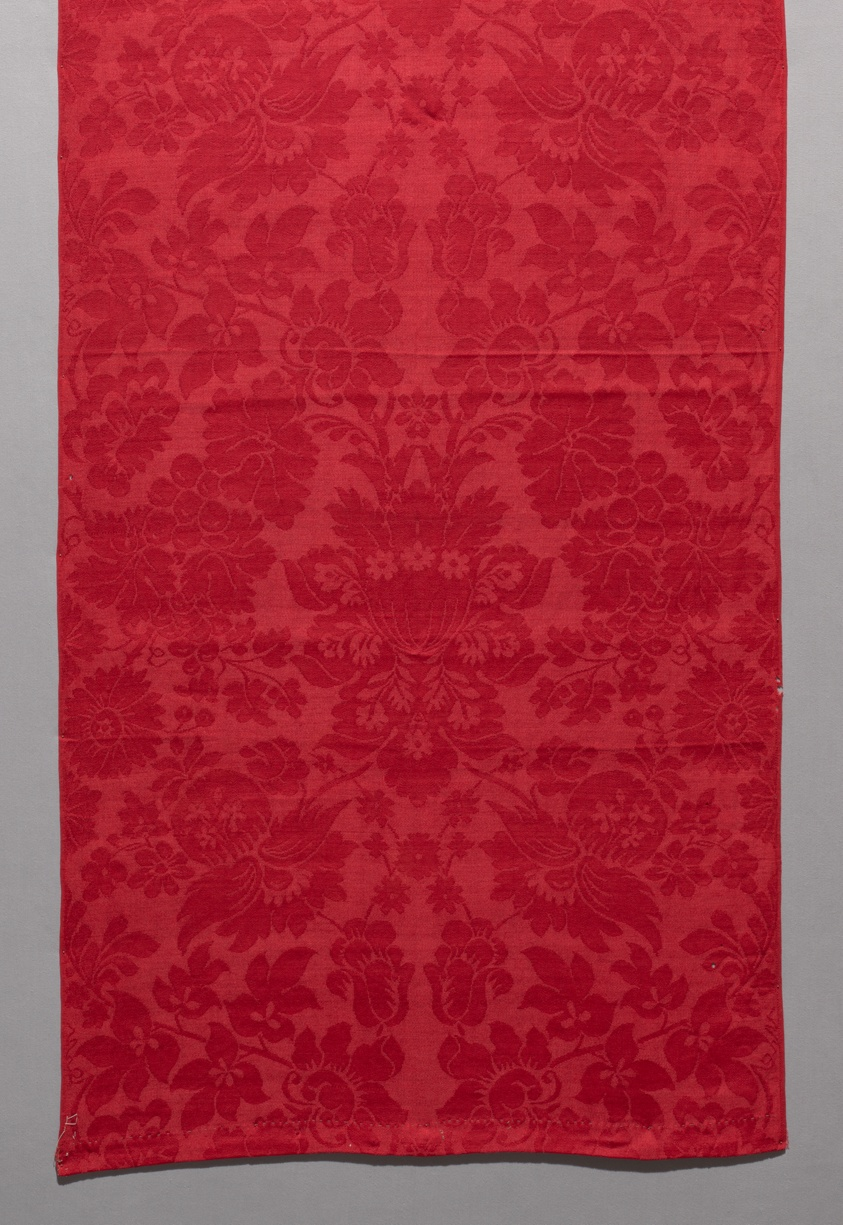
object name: Textile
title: Panel of Wool Furnishing Damask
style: 18th Century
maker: England, Norwich or Spitalfields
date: 1740-80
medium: Wool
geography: England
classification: weaving; textile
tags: floral motifs